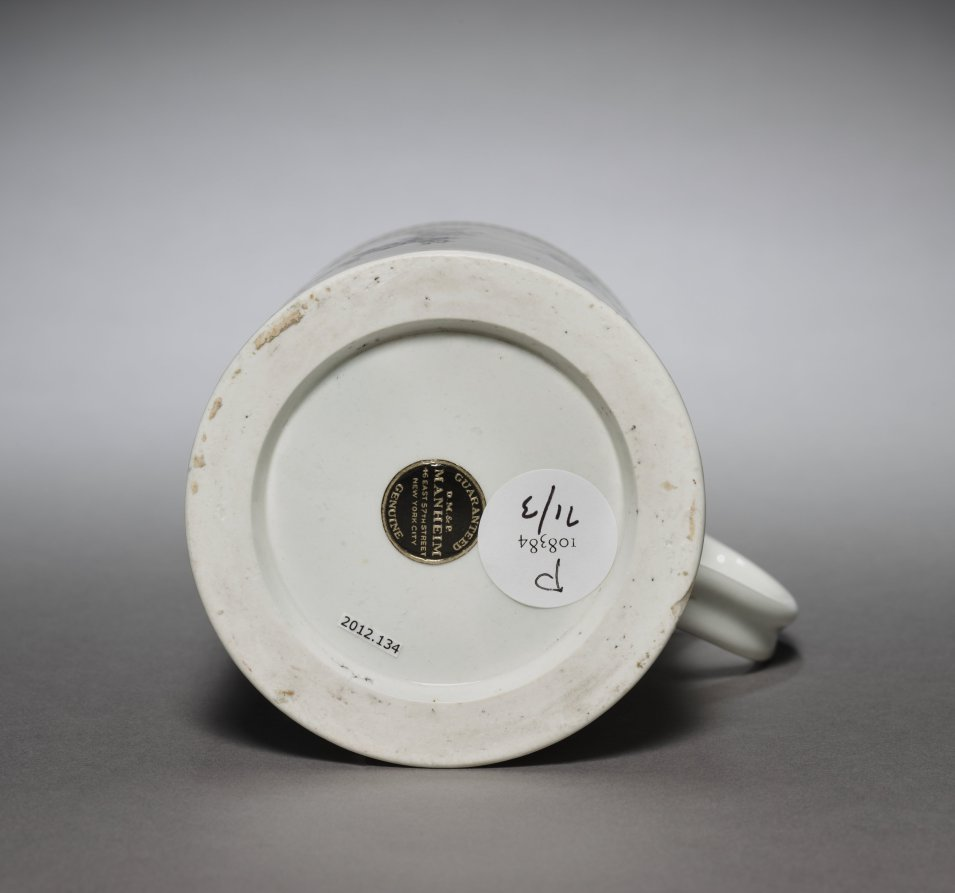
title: Cann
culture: England, 18th century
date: c. 1770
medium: ceramic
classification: Ceramic